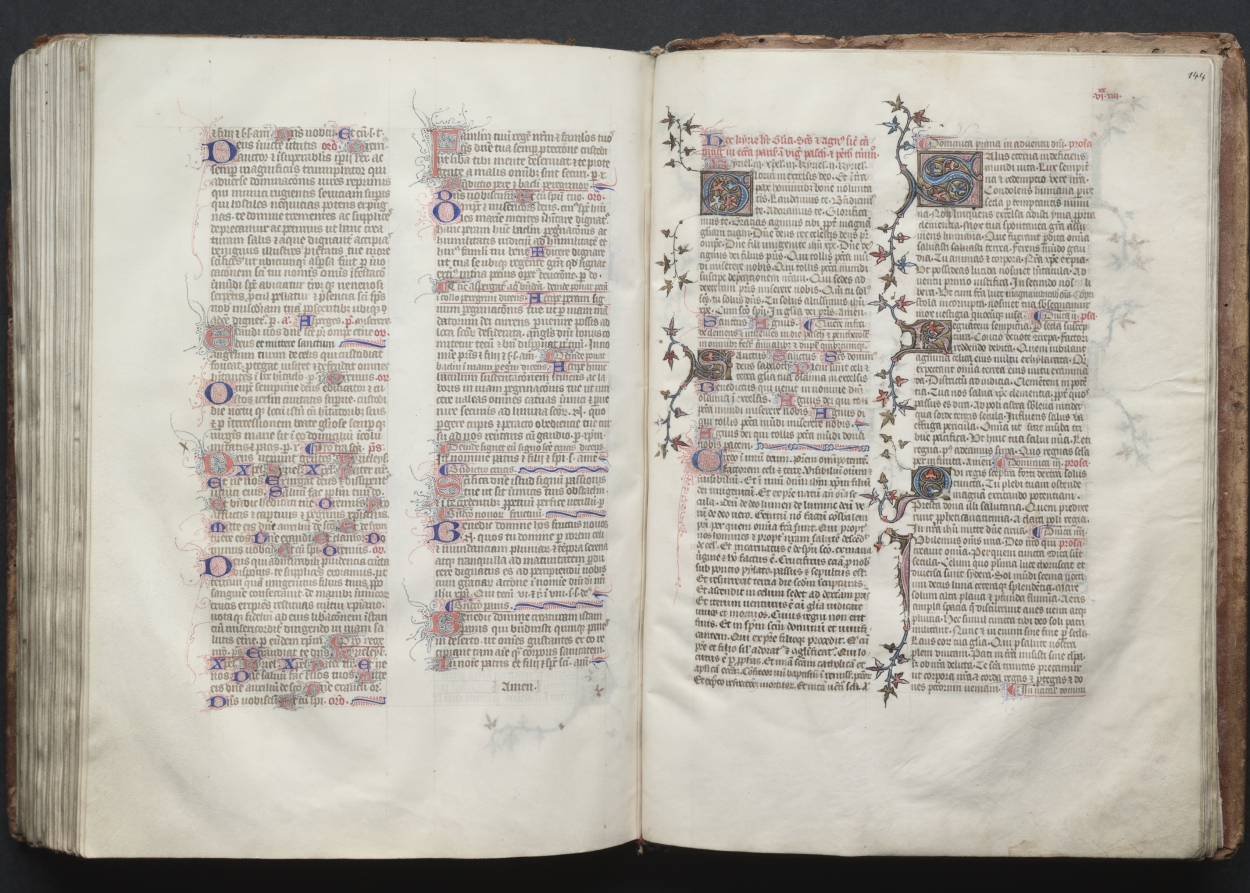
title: The Gotha Missal: Fol. 144r, Text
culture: France, Paris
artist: Master of the Boqueteaux (French)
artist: and Workshop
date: c. 1375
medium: ink, tempera, and gold on vellum; blind-tooled leather binding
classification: Bound Volume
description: The style and quality of this manuscript's decoration is typical of deluxe Parisian books made for aristocratic or royal patrons. Most of the book's decoration appears to be the work of the Master of the Boqueteaux, an artist active at the court of King Charles V (died 1380). His style was apparently shared by a number of book illuminators working in and around Paris. It is very possible that the Gotha Missal belonged to Charles V, but is not provable because the manuscript has no royal portraits and lacks a colophon. Given the book's magnificent decoration, however, it would seem that it was produced for a Valois prince, if not for the king himself. The manuscript receives its name from the German dukes of Gotha, its later owners.